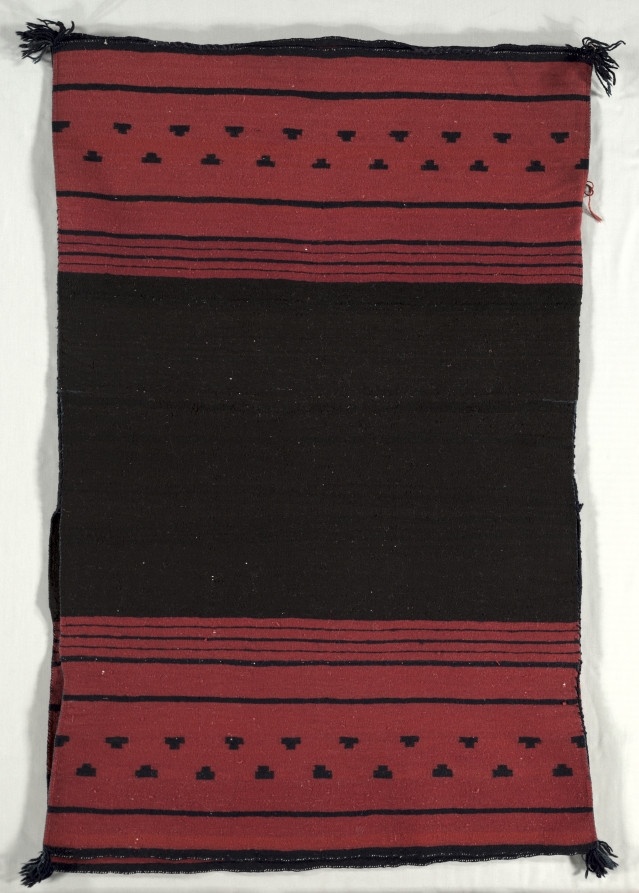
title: Woman’s Two-Piece Dress (Biil’éé)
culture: Native North America, Southwest, Diné (Navajo)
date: c. 1880–85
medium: Wool: tapestry weave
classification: Textile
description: According to D. Y. Begay, the contemporary Diné (Navajo) weaver, every Diné woman should own a bill’éé (dress), which holds spiritual power, confers protection, encodes stories about the aesthetic of Diné culture, and ensures her place in society. This example is made of two matching panels attached on the sides and shoulders, a type that developed from single-panel dresses in the late 1700s. Originally gathered at the waist with a woven belt, the dresses also can be cinched with silver concha belts of Diné creation. Today, the bill’éé continues to respond to fashion trends and is worn on special occasions.